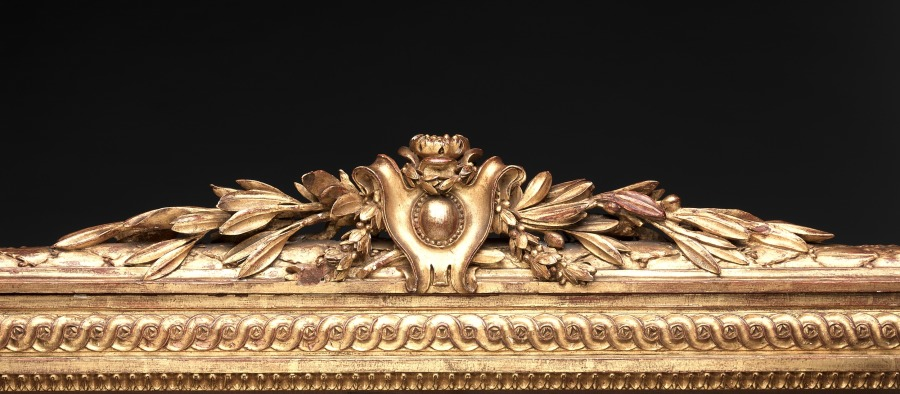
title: Fire Screen (Écran de Cheminée) and Textile Panels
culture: France, Paris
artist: Georges Jacob (French, 1739–1814)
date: c. 1780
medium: gilt wood, upholstery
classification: Furniture and woodwork